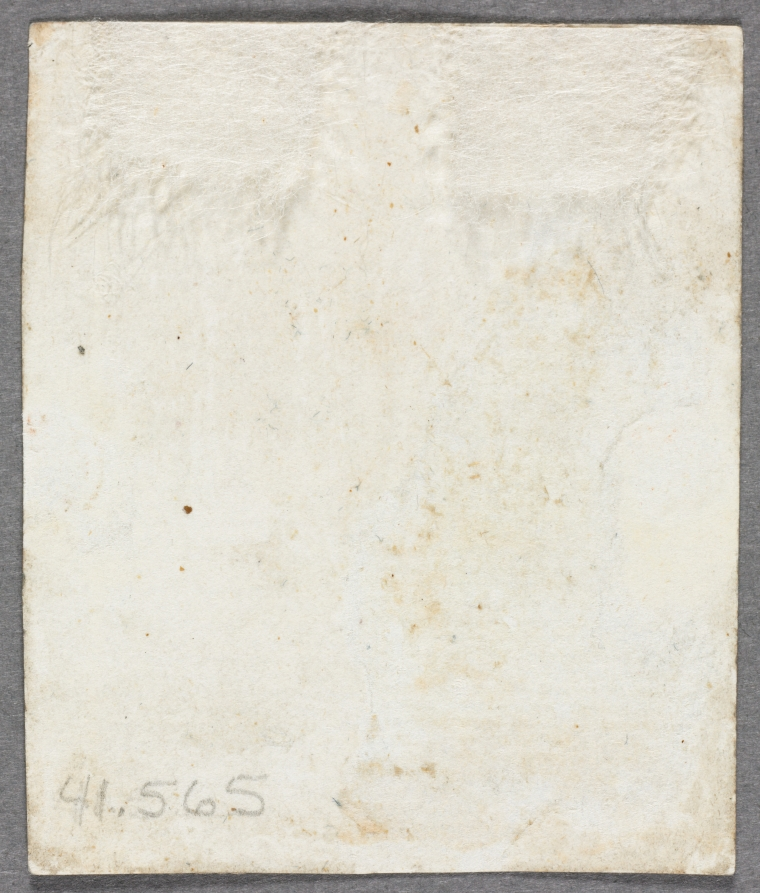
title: Portrait of a Woman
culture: England, 18th century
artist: John I Smart (British, 1741–1811)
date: c. 1776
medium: graphite and wash on laid paper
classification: Portrait Miniature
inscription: inscribed on front of paper at upper right corner: 119 (or 115?); inscribed on paper backing, in graphite, upside down at lower left: 10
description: Although it is impossible to say if it was always part of the artist’s process to execute a preparatory sketch prior to painting each miniature, we do know that John Smart retained many hundreds of these sketches. A group of preparatory sketches—of which this portrait is one—descended through the Smirke family after Smart’s daughter Sarah gave a sketchbook containing preparatory portrait studies to her friend Mary Smirke, sister of the celebrated Victorian architect Sydney Smirke. This book was probably broken up around 1877 when it was divided between Sydney’s daughters Mary Jemmett and Mrs. Lange, whose portions were both sold at auction in 1928. Compared to his contemporaries George Engleheart (1752–1829) and Andrew Plimer (1763–1837), whose female sitters were often painted in similar simple white gowns, Smart often lavished more attention on the costumes in his portraits of women, whose dresses incorporated colored silks, printed fabrics, and luxury trimmings like lace and fur. The sitter’s head and shoulders face left. She has what was probably once blond hair—now faded to pink—dressed high on her head, with curls down the back of her neck, over which a veil descends. Her eyes are hazel, and the color of her lips has almost completely faded. Positioned in an oval, and revealing much of her left breast, she wears a low-necked dress with faint traces of pink pigment, trimmed with a string of pearls. The background is unpainted. To this date, the finished ivory for which this preparatory sketch was presumably undertaken has not been discovered. The portrait was assigned the historically colorful but fictitious title of “Henrietta Maria” at some point after memory of its true identity had been lost. Giving illustrious titles to portraits of unknown sitters was a popular strategy adopted by dealers during the nineteenth and twentieth centuries, often applied to miniature portraits and, in particular, to Smart’s sketches of women. In 1948 Arthur Jaffé wrote to the Cleveland Museum of Art that a “Mrs. Samuelson of Exeter recently brought me two frames, with six sketches mounted in each, of ladies, mostly with fancy names. I think there is no doubt that they were part of Mrs. Lange’s share of the Smirke sketches, though unlike yours they did not pass through Christie’s auction in Dec. 1928. I persuaded Mrs. Samuelson to let me remove them from their frames and to rub the paper backing from the card on which the sketches are painted. The result was as follows. Included was a No. 115 called, Margaret, Archduchess of Austria, which is the same number given to our Henrietta Maria.” Elsewhere Jaffé notes that the number on the front of this sketch was probably a 119 instead of a 115.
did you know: Sketches helped John Smart work out the particulars of a portrait before commencing the miniature on ivory; they were useful in the event that a duplicate might later be required.